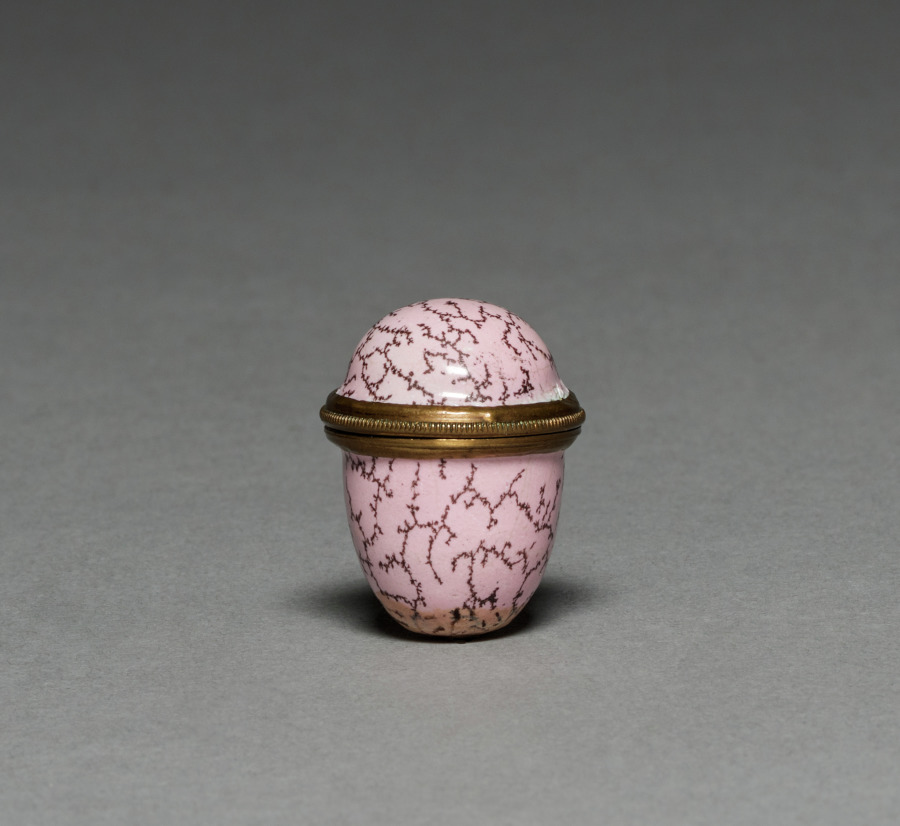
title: Thimble and Container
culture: England, mid-18th century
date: mid-18th century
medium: enamel on metal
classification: Enamel